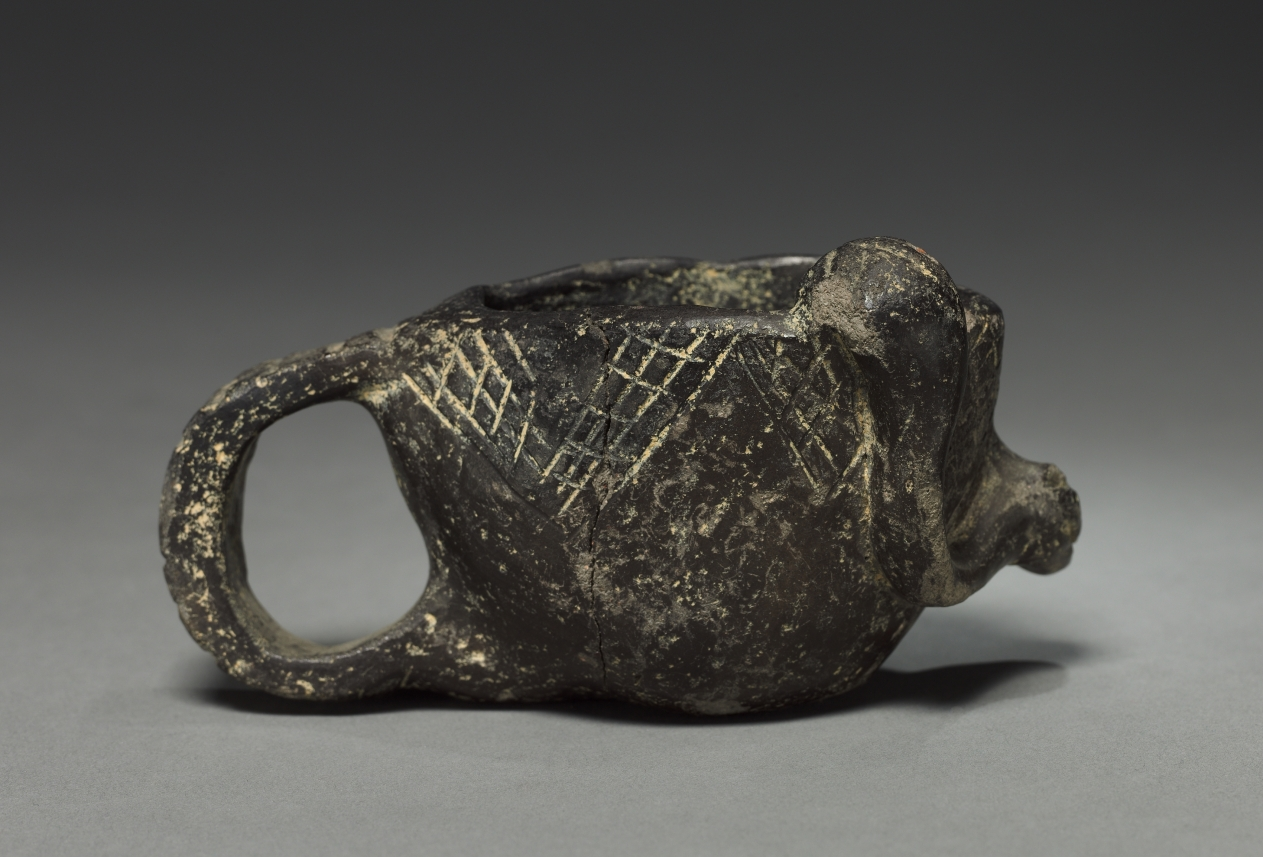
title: Dish with Handle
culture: Colombia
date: before 1921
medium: pottery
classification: Ceramic